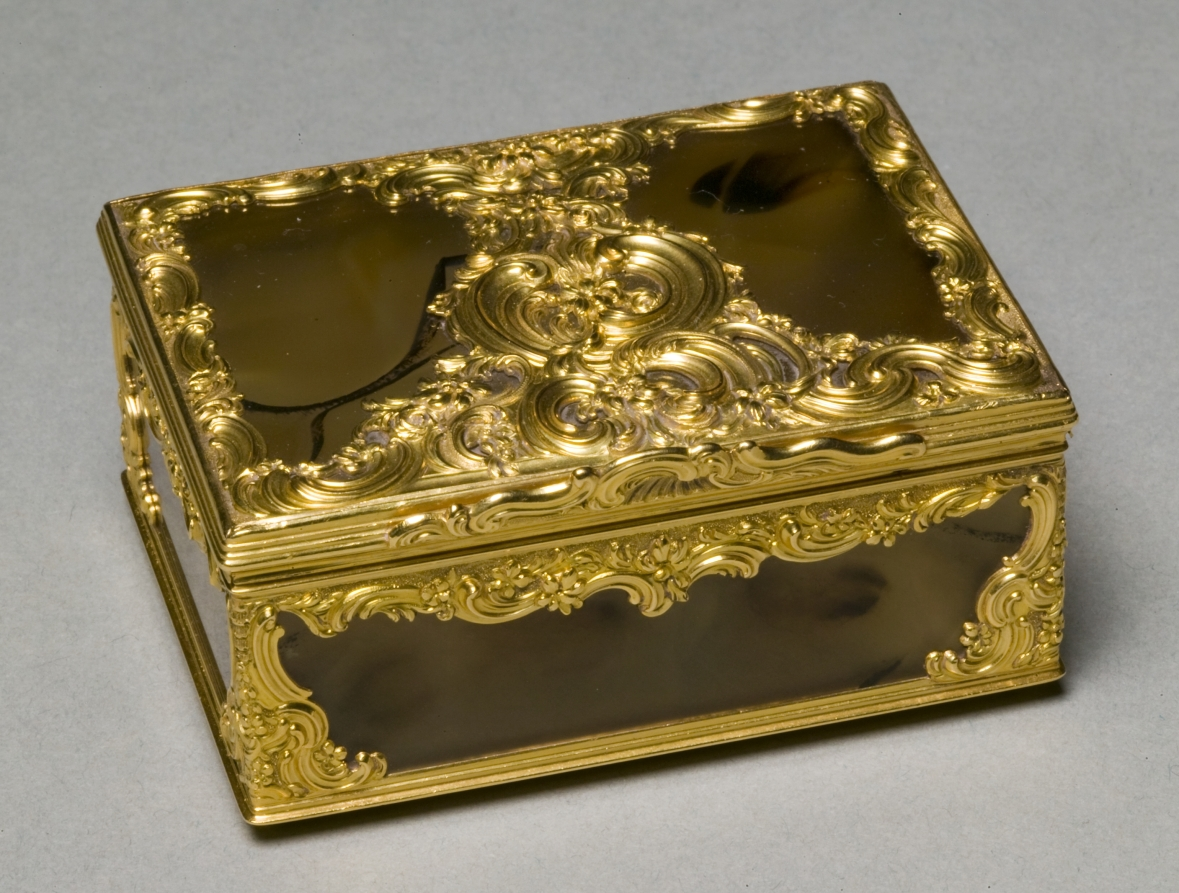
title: Snuff Box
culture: England, London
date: c. 1760–70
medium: agate, gold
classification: Miscellaneous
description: Luxurious personal objects, like this snuff box, were an essential part of a privileged wardrobe during the 1700s and early 1800s, emphasizing their owner’s refinement and wealth. Their glittering surfaces, however, disguised a system based on the labor and suffering of enslaved or indentured people, whether in gold or stone mines, tobacco farms, or shops where these goods were made. Like cotton, sugar, and tea, snuff came from British colonies in America, India, and the Caribbean, where enslaved people were exploited to grow these crops under extremely harsh conditions. Slavery was not abolished in much of the British Empire until 1833. Britain and other European nations continued to pursue colonialism with a sense of superiority that found its way into all aspects of life, including decorative objects glorifying their conquests.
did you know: This small, elaborate box held snuff, a form of powdered tobacco that was inhaled in tiny amounts.